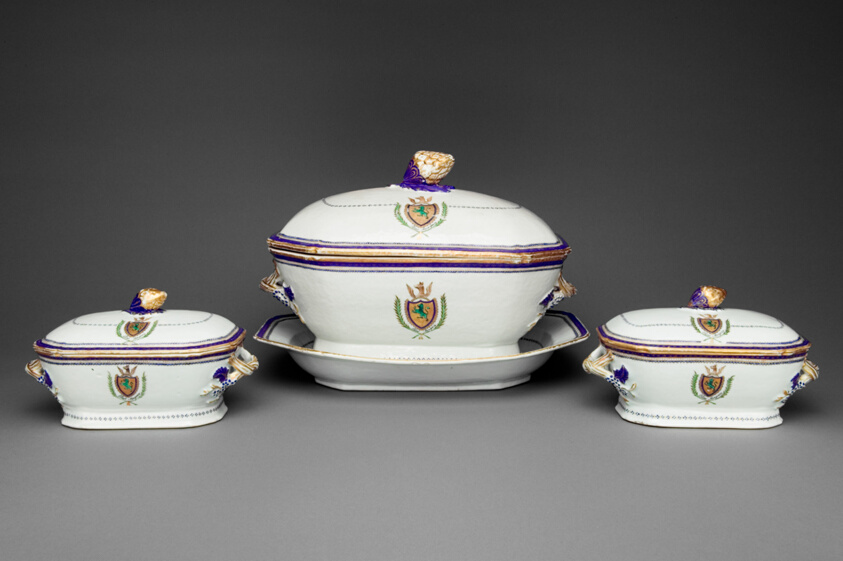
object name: Ceramics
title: Tureen with Cover and Stand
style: chinese export, 18th Century, Chinese (culture or style), East Asian, asian, qianlong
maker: Artist unknown (Chinese, made for the American market); China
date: c. 1787–90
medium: Hard-paste porcelain, glaze, with enamels in colors, and gilding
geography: China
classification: chinese export porcelain; American market; stand; tureen; art of the americas; porcelain; ceramics; decorative arts; pottery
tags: coat of arms, geometric motif, grapes, lions, pine cones, purple (color), vines, dining